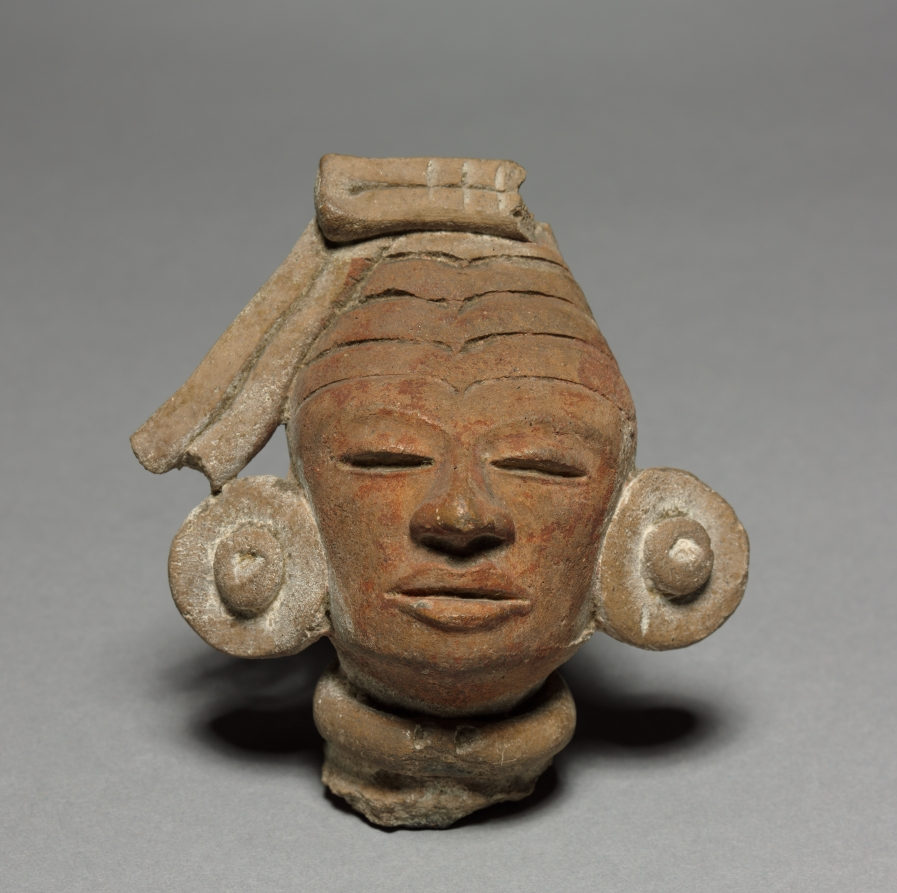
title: Figurine Head Fragment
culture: Central Mexico, Teotihuacán, Classic period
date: 150–350 CE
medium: ceramic, pigment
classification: Ceramic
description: The earliest Teotihuacan figurines are hand modeled, while later specimens were produced with molds. This exceptionally large example has a mold-made head, with facial features carefully retouched by hand. Earthenware figurines were made in great abundance throughout Teotihuacan's history, and may have been used in household religious rituals.